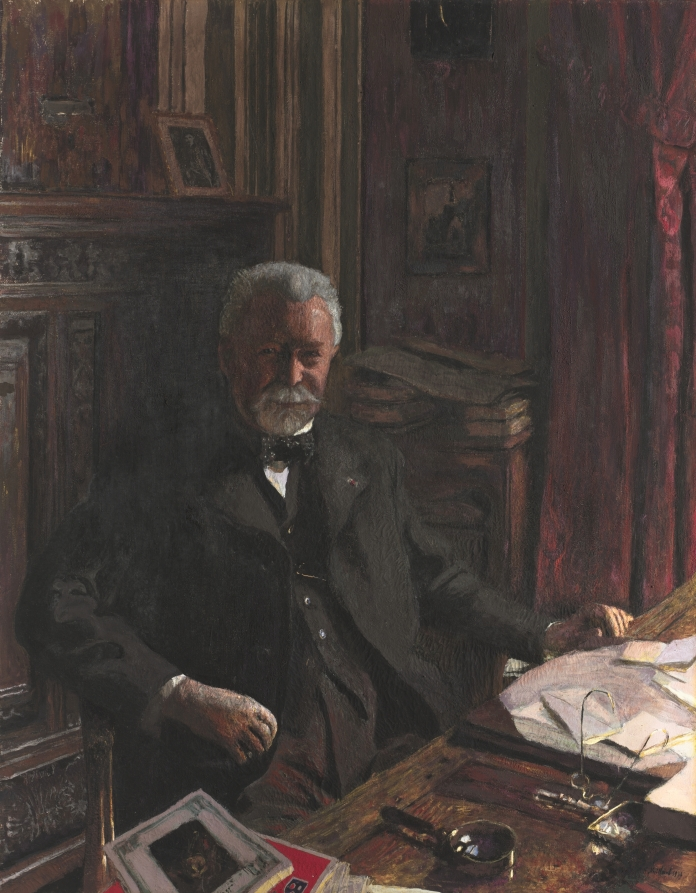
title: André Bénac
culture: France, 20th century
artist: Édouard Vuillard (French, 1868–1940)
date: 1936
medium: oil on fabric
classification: Painting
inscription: Signed lower right: E. Vuillard 1936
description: Vuillard belonged to the artistic movement called The Nabis, the Hebrew term for prophet. The Nabis banded together in the late 19th century to create a new artistic language based upon the expressive potential of decorative color and stylized forms. Vuillard's success as part of this group encouraged wealthy patrons to seek his services, but for more realistically rendered portraits. The present piece was requested by the Compagnie Parisienne de Distribution d'Éléctricité, the Paris company for which the sitter, André Bénac, was president. The commission was made to commemorate Bénac receiving the Grand Croix, the highest award of the Legion of Honor. Vuillard made two versions of the portrait-this one meant for Bénac and another one, now in Zurich, Switzerland, (see photo), to remain the property of the company. In each case, the sitter appears in his living room/office, and he holds an identical pose, showing the same warm, friendly smile. However, in the museum's portrait, Vuillard omitted a significant portion of the surrounding room and altered the format from horizontal to vertical. The viewer can focus more easily upon the man represented because the diagonal of the table has been cut closer to the sitter and no longer leads the eye away toward the window. Photo of: Vuillard. André Bénac, 1935-36; distemper on canvas; 51 in. x 61 1/2 in. Fondation Rau pour le Tiers-Monde, Zurich.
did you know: In the final two decades of his life, Vuillard focused primarily on painting portraits of notable figures in finance, politics, art, and literature.